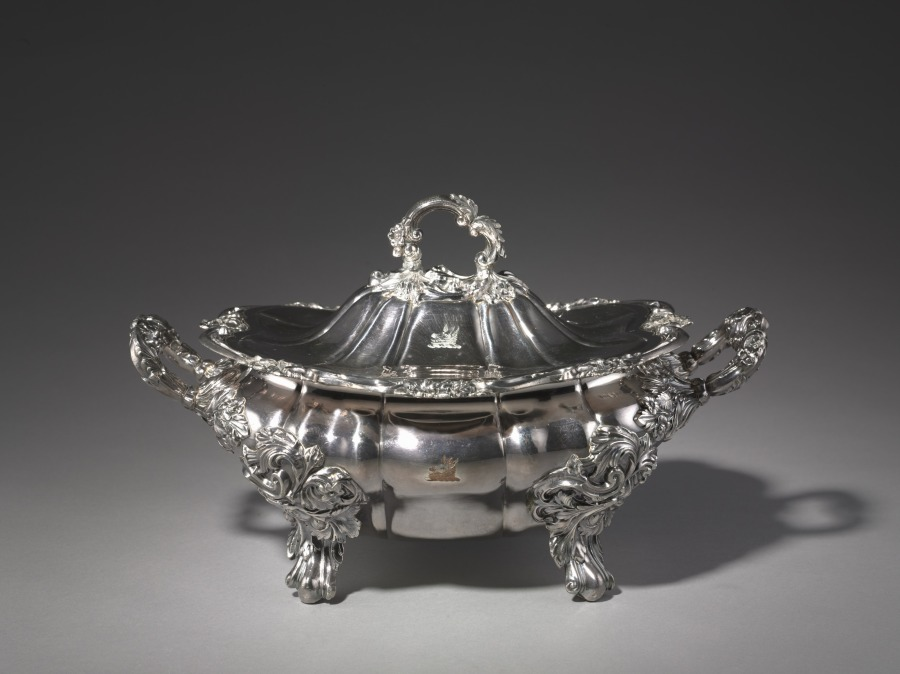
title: Covered Tureen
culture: England, Sheffield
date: c. 1830–50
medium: Silver plated on copper (Old Sheffield Plate)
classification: Silver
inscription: Four boars head crests: Two on either side of the vessel and two on either side of the lid.